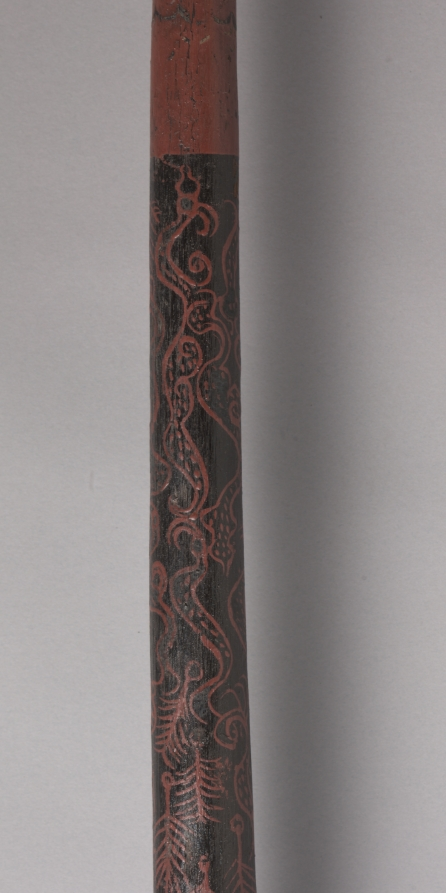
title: Cranes and Serpents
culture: China, reportedly from Hunan province, Changsha, Warring States period (475–221 BCE), State of Chu (c. 1046–223 BCE)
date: 475–221 BCE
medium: lacquered wood with polychromy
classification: Sculpture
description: A different style of ritual art developed in the state of Chu in South China. In addition to bronze vessels, lacquered wood artifacts expanded the repertory of ritual implements. This extraordinary sculpture was probably a drum stand for supporting a suspended drum in ritual ceremonies. It is unique among other excavated drum stands of the Chu, which typically show two birds standing on tigers. The theme of the bird stepping on the serpent was common in the Chu visual culture. Yet the slender proportions and seemingly flimsy structure of this particular set raise the question of whether it was utilitarian or mostly served symbolic functions in the tomb. The birds' and serpents' bodies have designs painted in red lacquer and yellow pigment against the black lacquer. Scientific analyses confirm the additional use of a blue or green pigment that has been discolored over time.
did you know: The cranes' long necks allowed a lightweight drum to be suspended from strings through the beaks, while the densely intertwined snakes provided a weighty base to stabilize the object during musical performances.